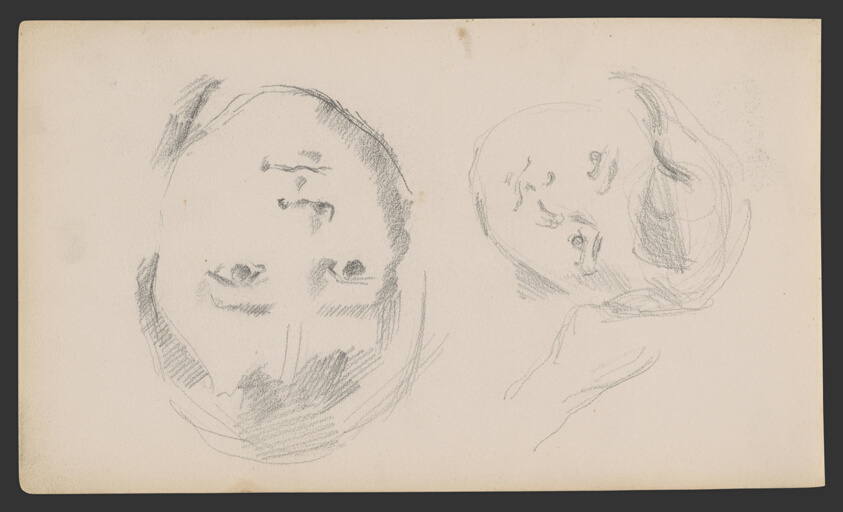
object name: Drawing and Watercolor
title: Sketchbook No. 2 (L'Estaque)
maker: Paul Cézanne; French, 1839-1906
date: 1875–86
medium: Graphite and pen and ink drawings on paper, bound into a book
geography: France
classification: sketchbook; graphite; prints and drawing; paper